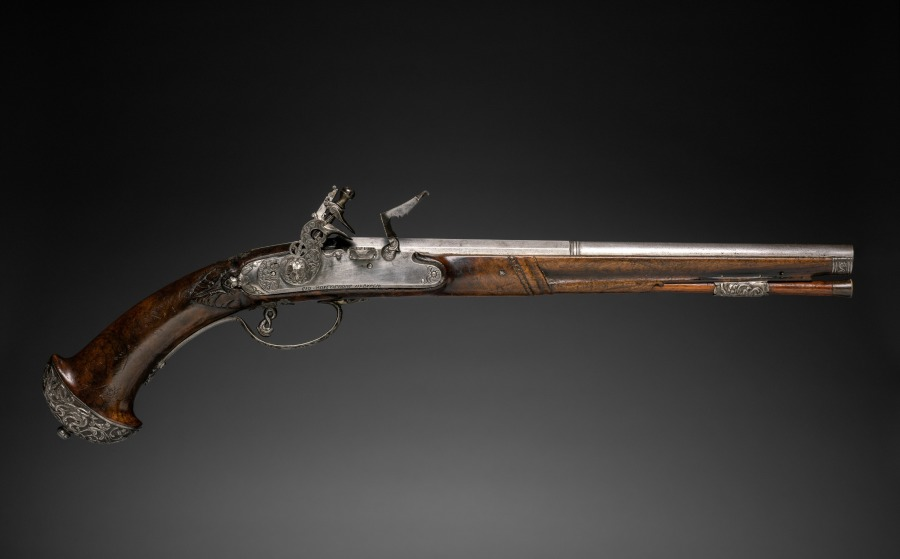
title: Flintlock Pistol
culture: Italy, Brescia, late 17th century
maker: Gio Borgognone (Italian)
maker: Lazarino Cominazzo (Italian)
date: c. 1690–1700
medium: steel, chiseled steel with walnut stock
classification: Arms and Armor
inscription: barrel signed: Lazarino Cominazzo; lockplates signed: Gio Borgognone in Bresia